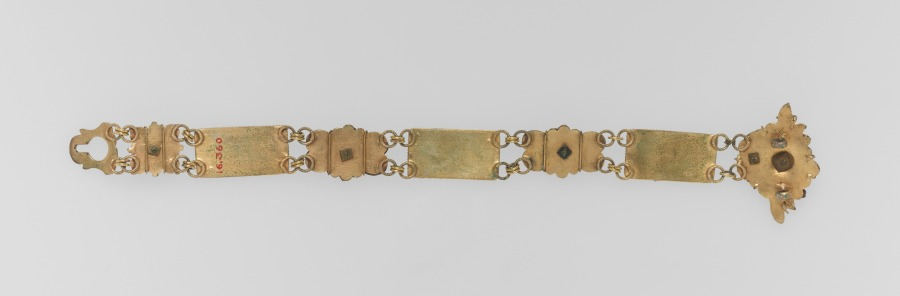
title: Belt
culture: Netherlands, early 18th century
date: early 1700s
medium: enamel on copper with gilt metal mounts and cloisonné medallions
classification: Enamel